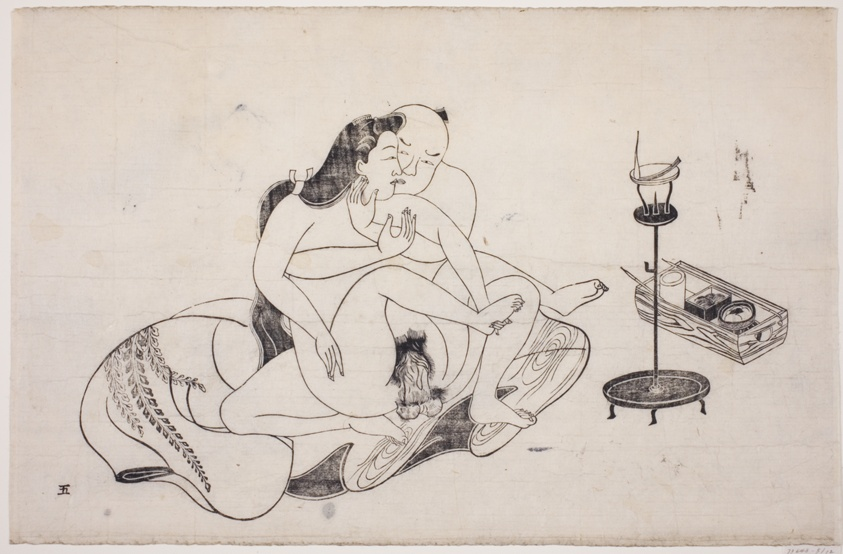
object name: Print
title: A sheet from a shunga album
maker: Japanese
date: 1679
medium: Woodblock print; sumizuri-e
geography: Japan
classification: print